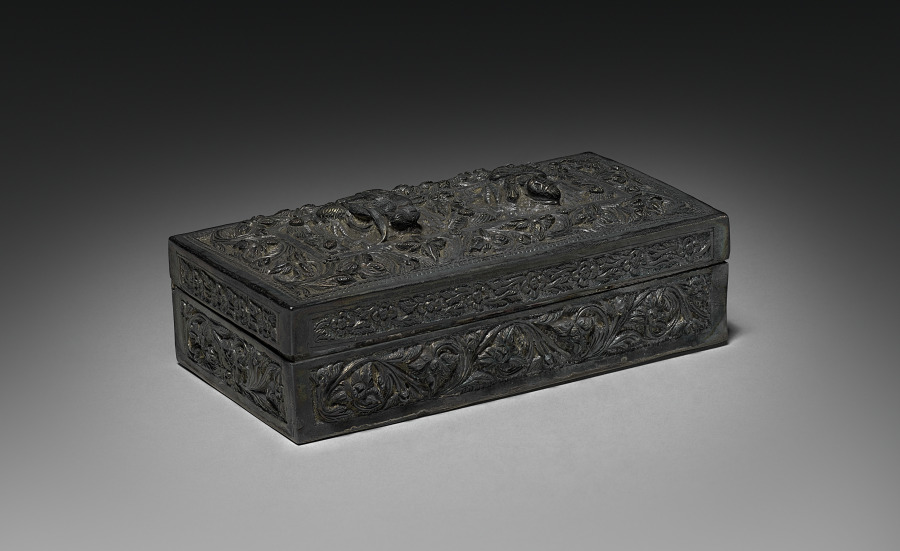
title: Rectangular Box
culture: Siam, 19th century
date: 1800s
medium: silver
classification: Metalwork